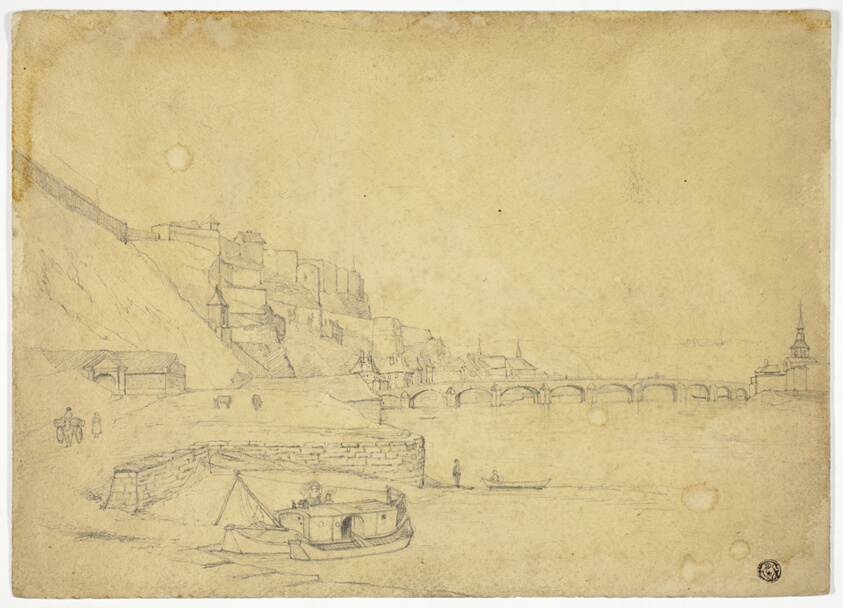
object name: Drawing and Watercolor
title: Citadel at Namur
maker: Attributed to George Arthur Fripp (English, 1813-1896); or Alfred Downing Fripp (English, 1822-1895)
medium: Graphite on tan wove card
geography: England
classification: graphite; drawings (visual works); prints and drawing